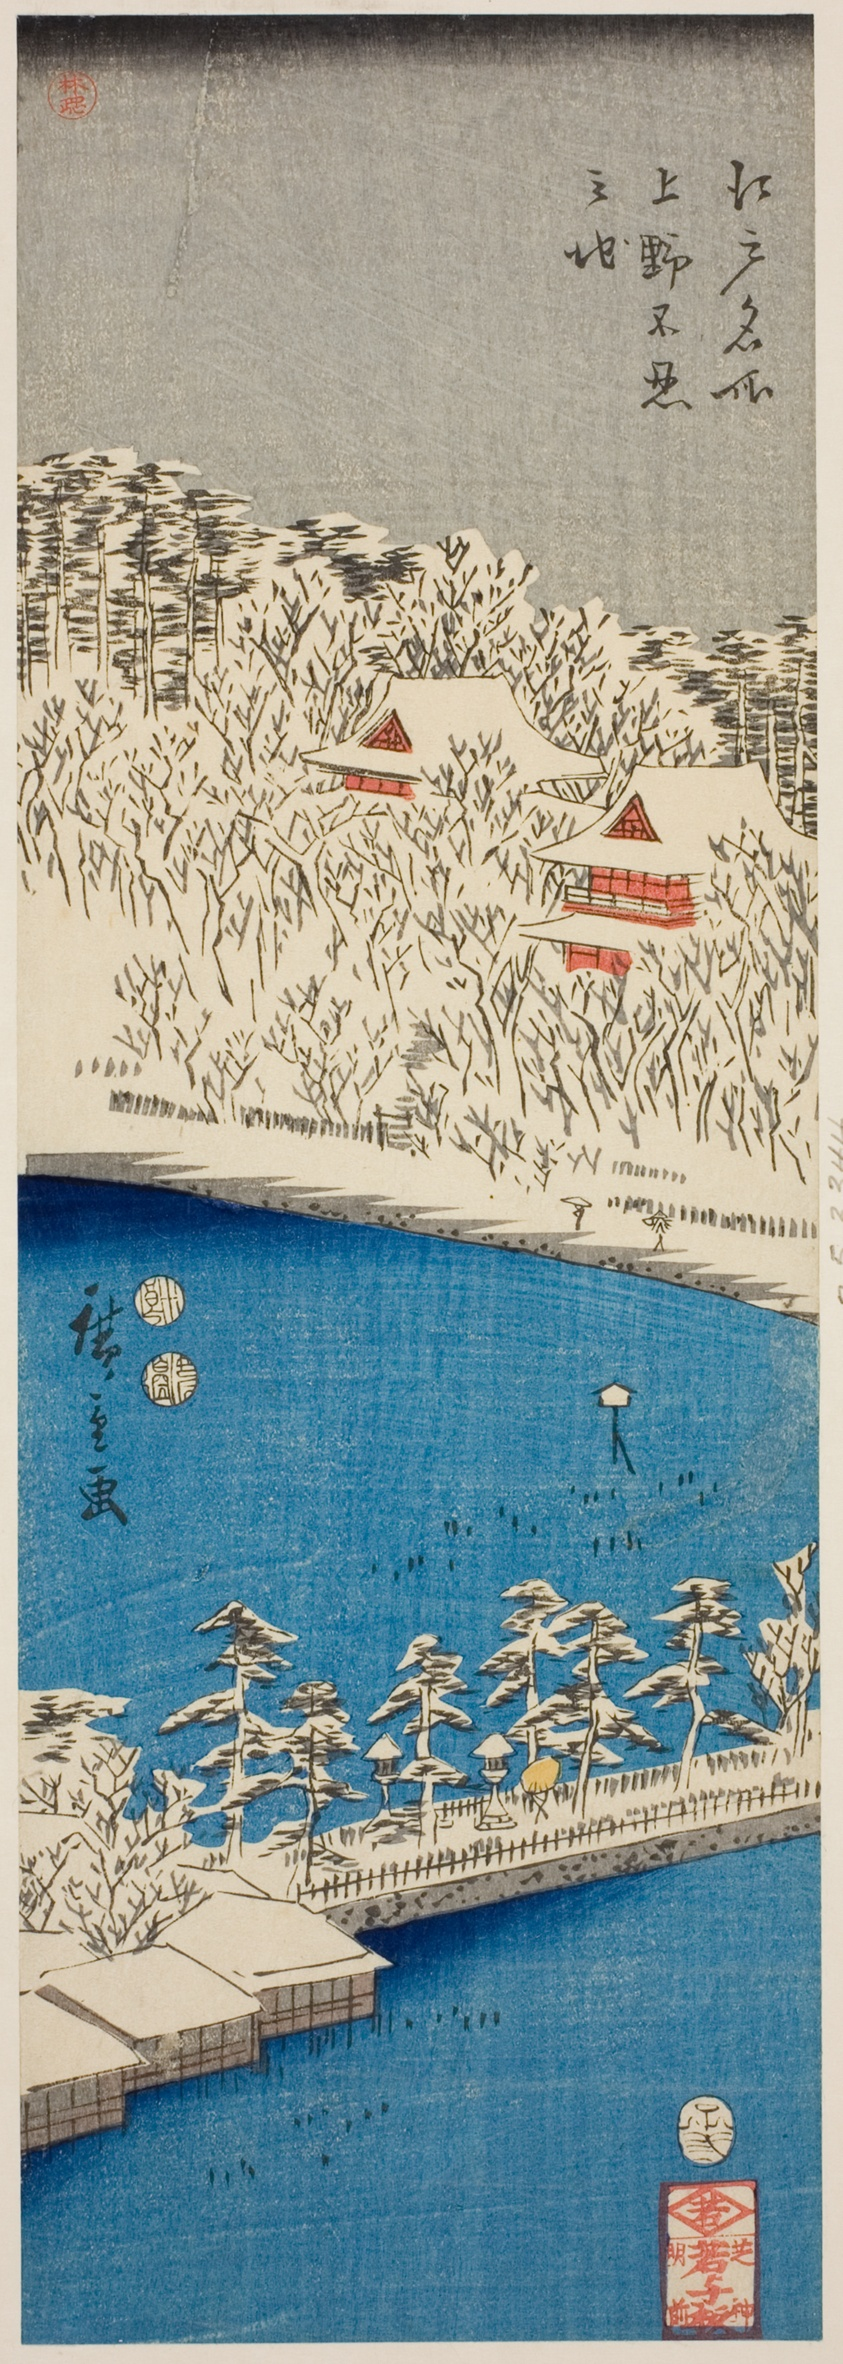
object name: Print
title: Shinobazu Pond at Ueno (Ueno Shinobazu no ike), from the series "Famous Places in Edo (Edo meisho)"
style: Japanese (culture or style)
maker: Utagawa Hiroshige 歌川 広重; Japanese, 1797-1858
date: 1852, third month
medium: Color woodblock print; chu-tanzaku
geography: Japan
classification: woodblock print; print; asian art